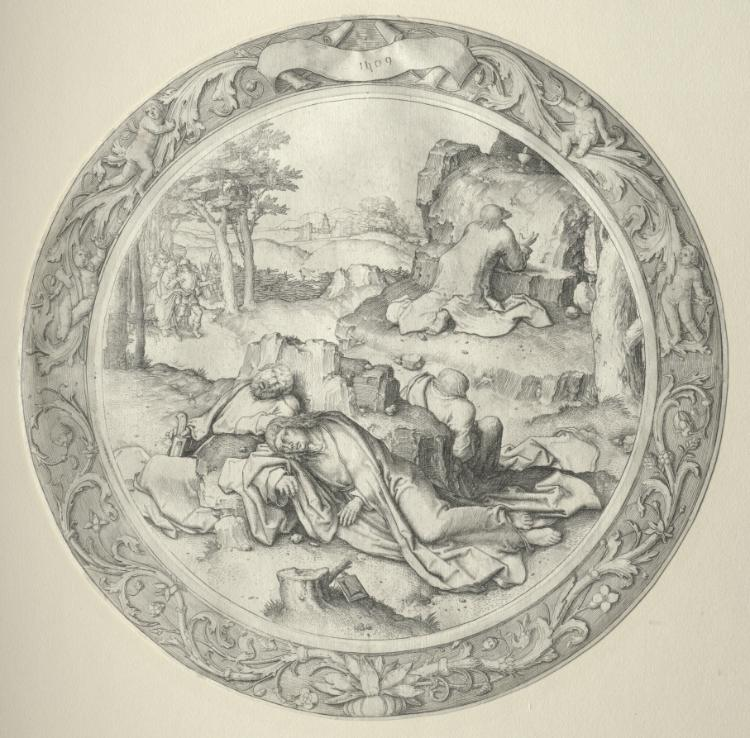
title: The Round Passion: Christ in Gethsemane (Agony in the Garden)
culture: Netherlands, 16th century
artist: Lucas van Leyden (Netherlandish, 1494–about 1533)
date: 1509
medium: engraving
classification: Print